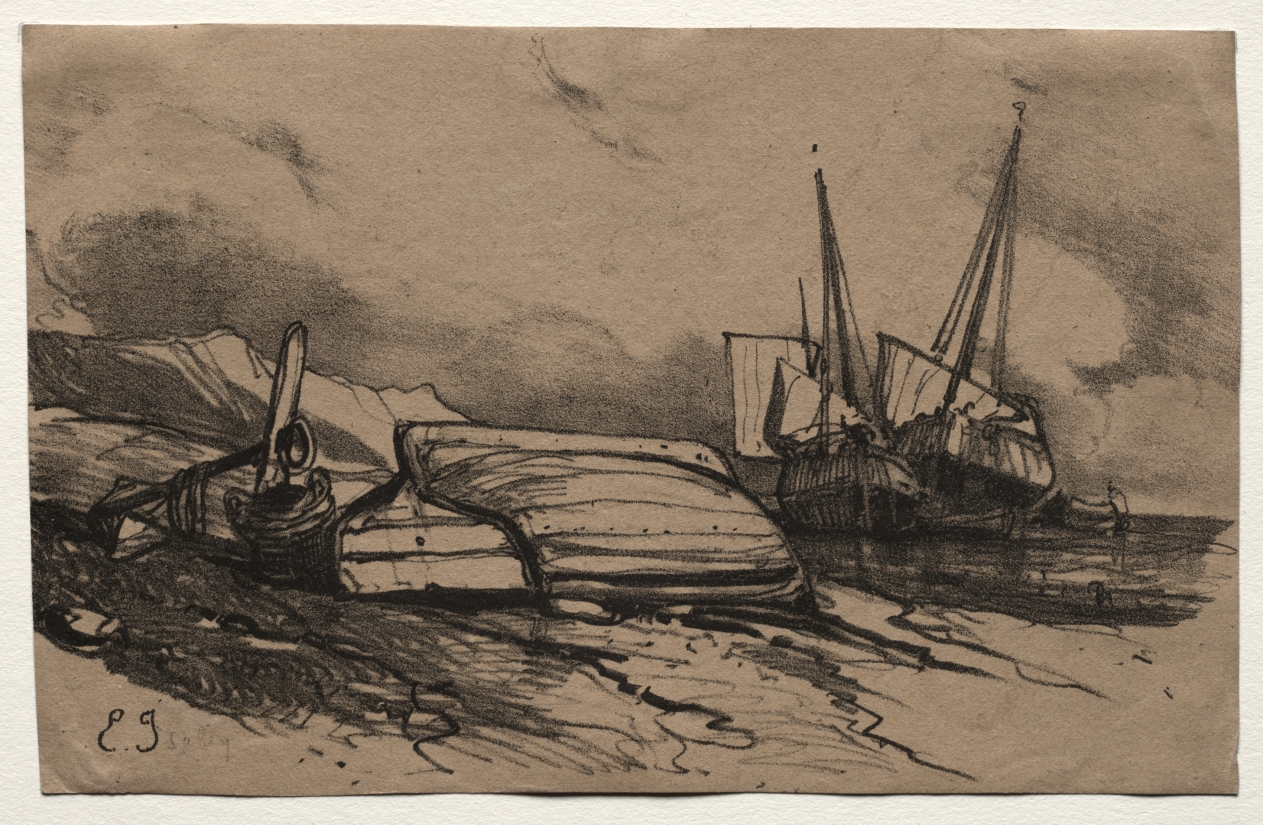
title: Six Marines: Couverture, Une Grève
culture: France, 19th century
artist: Eugène Isabey (French, 1803–1886)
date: 1833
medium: lithograph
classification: Print